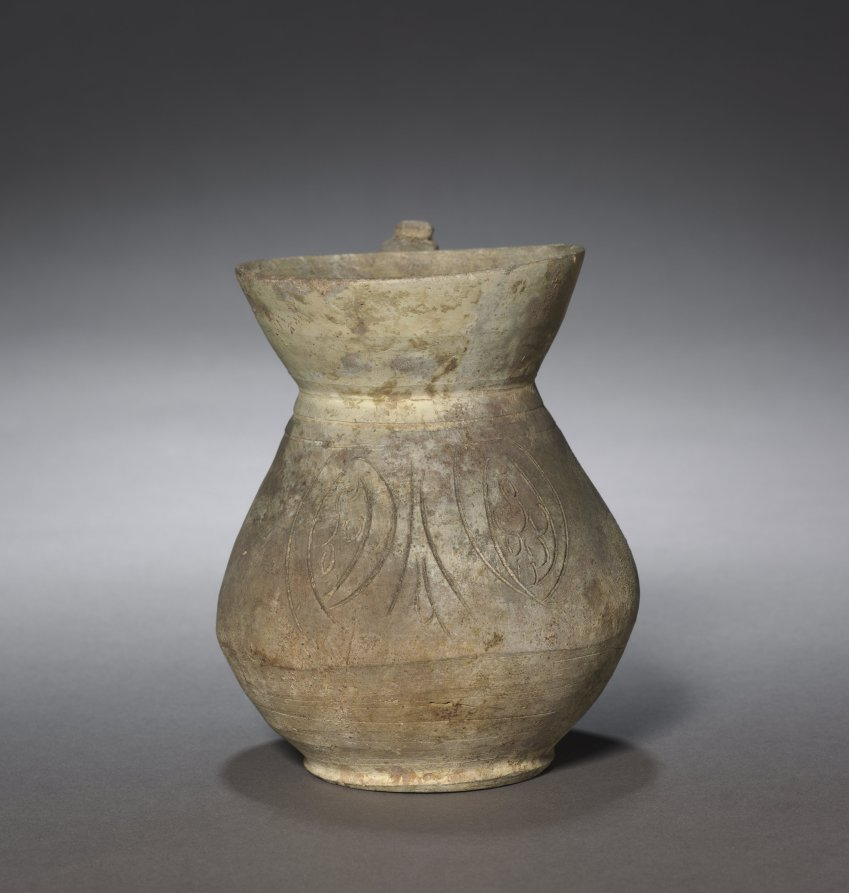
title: Jug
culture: Iran, Samanid period, 900s–1100s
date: 900s–1100s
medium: earthenware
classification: Ceramic